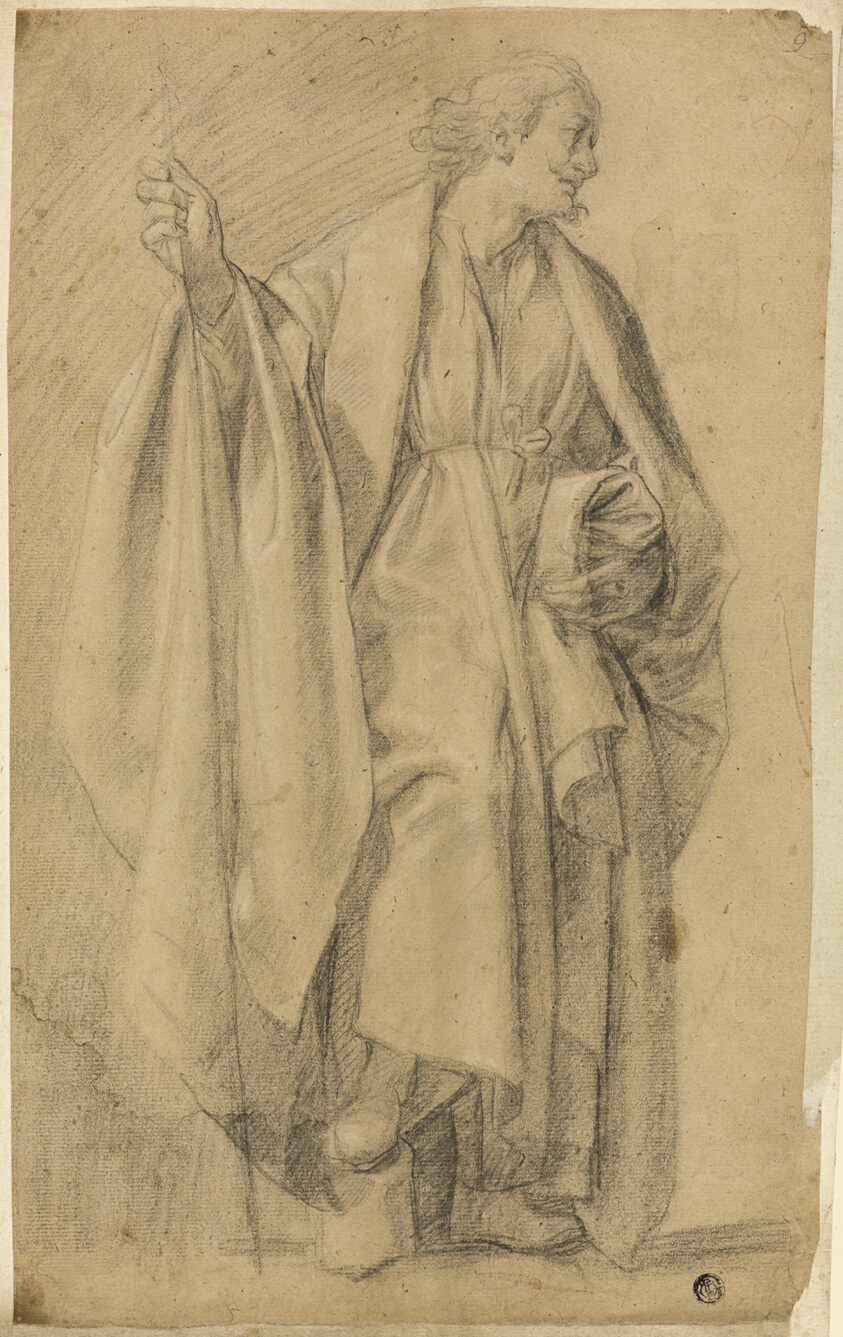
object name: Drawing and Watercolor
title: Standing Draped Male Figure, Holding Staff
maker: Unknown Artist; French or Italian, possibly Florentine, 17th century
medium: Black chalk, heightened with white chalk, on tan laid paper, tipped on ivory laid paper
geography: France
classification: charcoal; drawings (visual works); prints and drawing